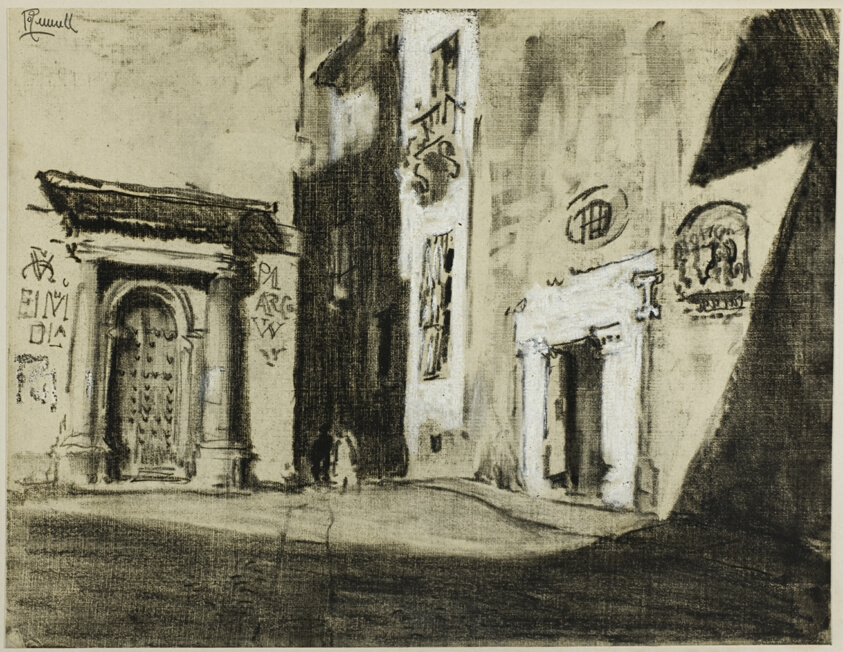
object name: Drawing and Watercolor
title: Toledo Streets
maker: Joseph Pennell (American, 1857-1926)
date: c. 1903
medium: Oiled charcoal with stumping and erasing, with white chalk, on cream wove paper, perimeter mounted on off-white wood pulp laminate board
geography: United States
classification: charcoal; drawings (visual works); prints and drawing